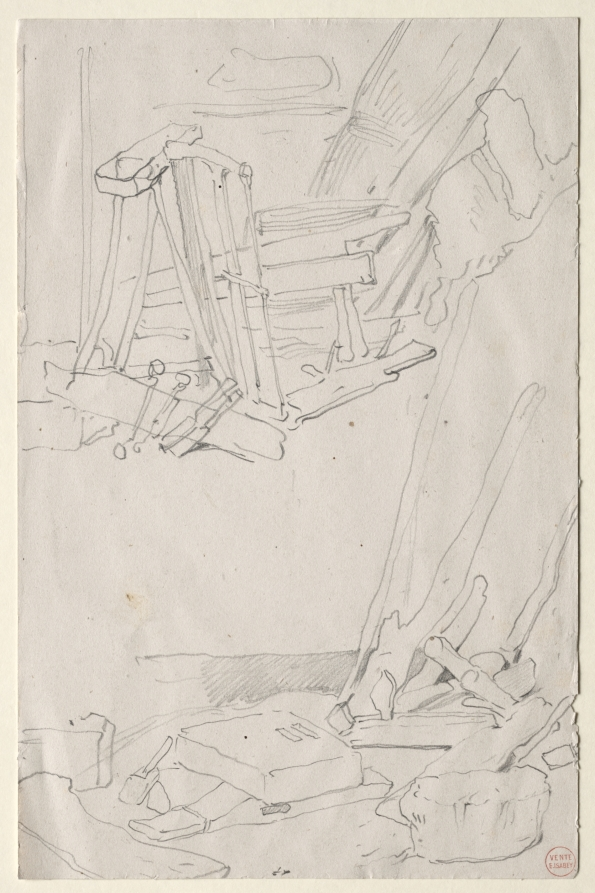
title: Studies of Wood and Farm Implements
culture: France, 19th century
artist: Eugène Isabey (French, 1803–1886)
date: c. 1824–86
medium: graphite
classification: Drawing